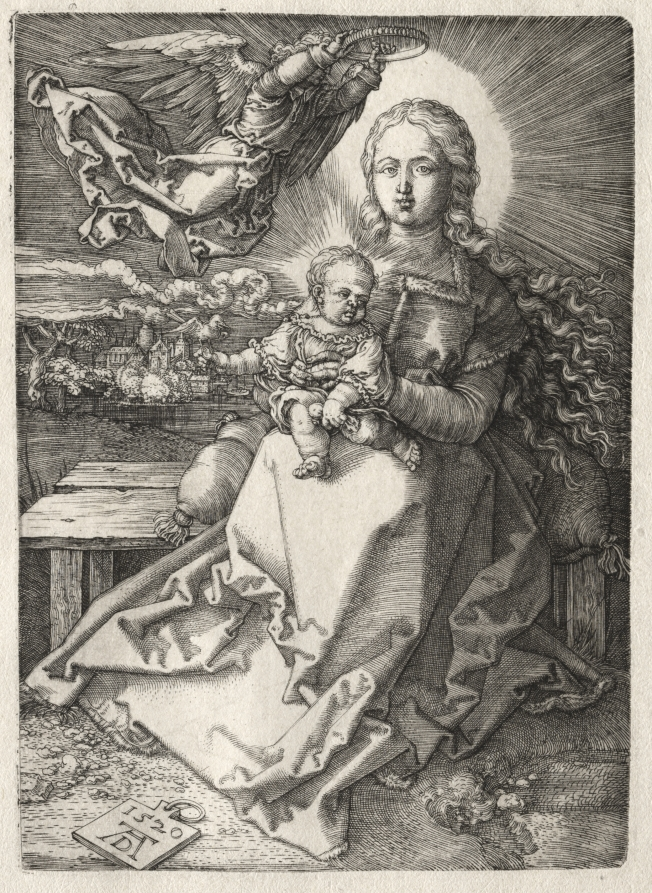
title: Virgin Crowned by an Angel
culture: Germany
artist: Albrecht Dürer (German, 1471–1528)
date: 1520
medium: engraving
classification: Print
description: The boundary between heaven and earth is obscured in this engraving as an angel descends to crown the Virgin with a simple diadem. Although she is plainly dressed and sits on a simple wooden bench, Dürer portrays Mary as the Queen of Heaven. Her direct gaze communicates her role as an intermediary with God for the sake of humankind. Like his Virgin with the Swaddled Child of the same year, Dürer employed a halo emitting dense striations of light to emphasize the Virgin’s holiness. He considered the two part of a set of three engravings and gave several away during his journey to the Netherlands from 1520 to 1521.